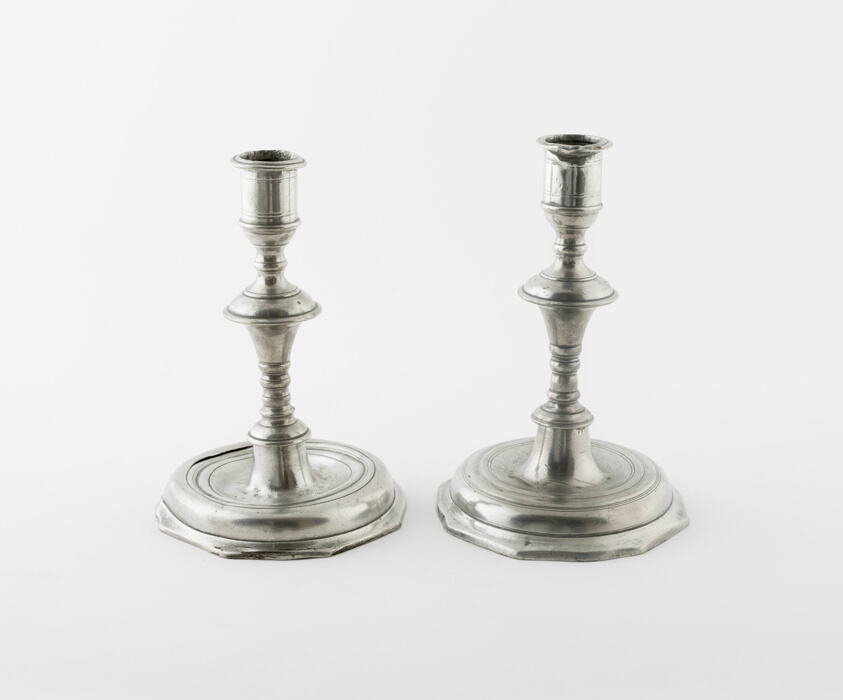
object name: Metalwork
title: Pair of Candlesticks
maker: France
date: c. 1740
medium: Pewter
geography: France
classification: candleholder - candlestick; candleholder; pewter; metalwork; european decorative arts